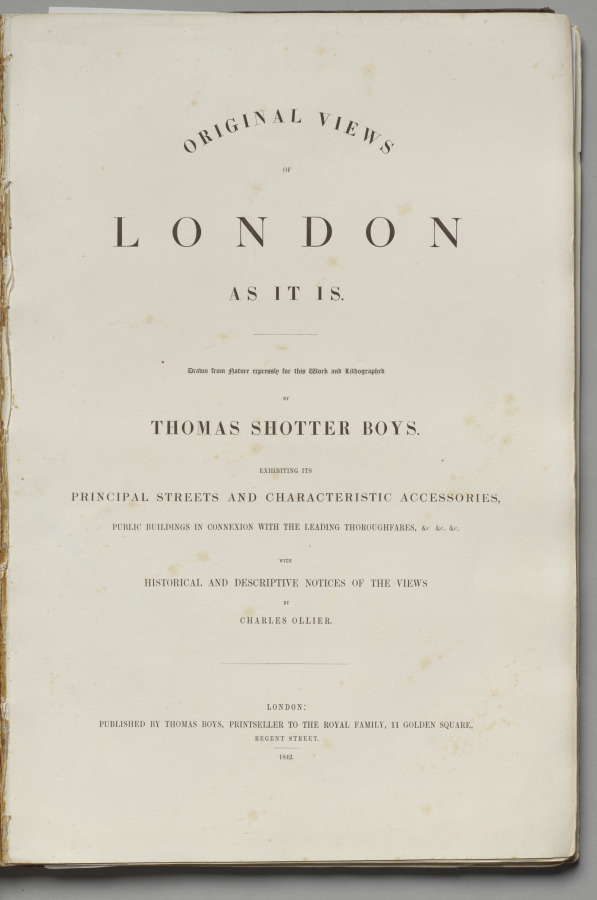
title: London As It Is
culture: England, 19th century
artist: Thomas Shotter Boys (British, 1803–1874)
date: 1842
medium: lithograph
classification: Bound Volume